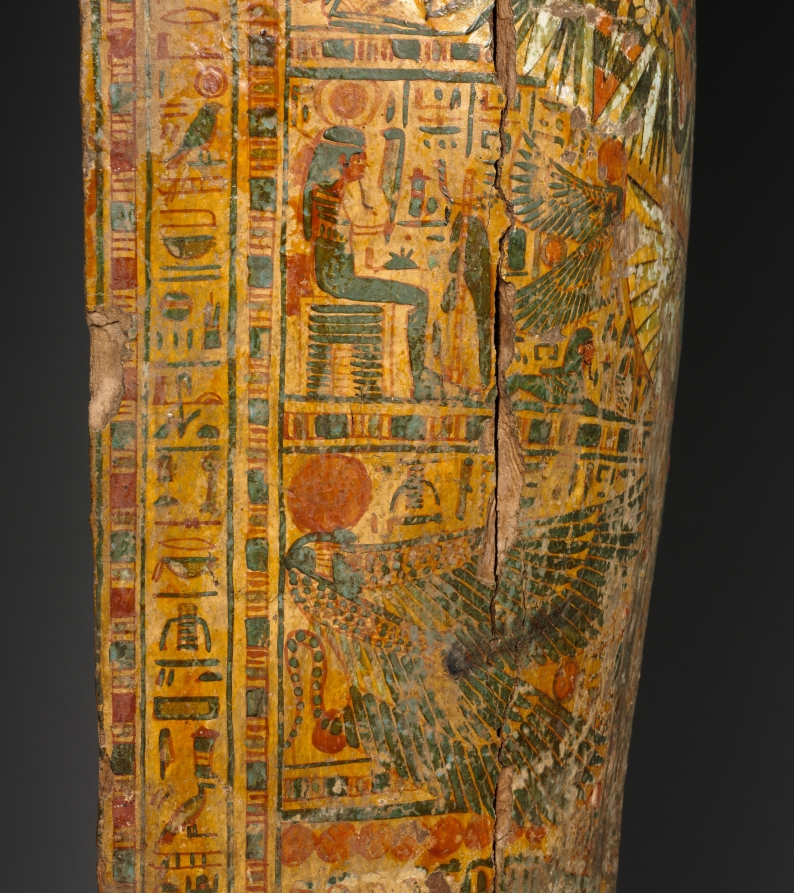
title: Coffin of Nesykhonsu (lid)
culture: Egypt, Third Intermediate (1069–715 BCE), Dynasties 21–22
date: c. 976–889 BCE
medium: gessoed and painted sycamore fig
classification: Funerary Equipment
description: A complete set of coffins during the late New Kingdom and Third Intermediate Period consisted of an outer and inner coffin and a mummy board (essentially a lid without a case, placed directly over the wrapped mummy). Judging by its size, this must have been Nesykhonsu's outer coffin. The type is essentially the same as the coffin of Bakenmut, which was also an outer coffin. The two coffins are said to have been found together and to have belonged to a man and wife. This is quite possible, although the inscriptions do not bear it out. Bakenmut is not mentioned on Nesykhonsu's coffin, nor is she mentioned on his. There was by this time a tremendous repertoire of scenes appropriate for coffin decoration. Whereas Bakenmut's coffin features images of deified dead pharaohs, Nesykhonsu's is decorated in a more personal way with scenes from her own funeral. The main scene in the interior (near the top) shows a priest clad in a panther skin with the mummy of Nesykhonsu behind. The god appears in mummy form and wears a sun disk on his head. The scarab beetle inside the sun disk identifies him as Khepri, the morning sun, and the hieroglyphs to the right identify him as Atum, the evening sun. Taken together, image and text represent the sun god in both his rising and setting, youthful and aged aspects.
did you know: Two of Nesykhonsu's titles, "Lady of the House" and "Singer of the Choir of Mut the Great," are written on the outside of the coffin.